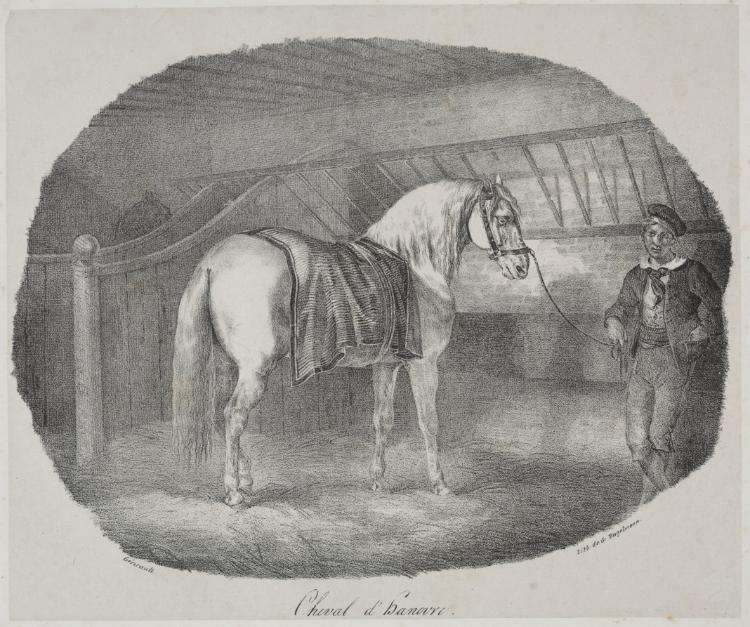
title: Horse from Hanover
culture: France, 19th century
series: Lithographic Studies of Horses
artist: Théodore Géricault (French, 1791–1824)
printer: Godefroy Engelmann (French, 1788–1839)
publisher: Gihaut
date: 1822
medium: lithograph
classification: Print